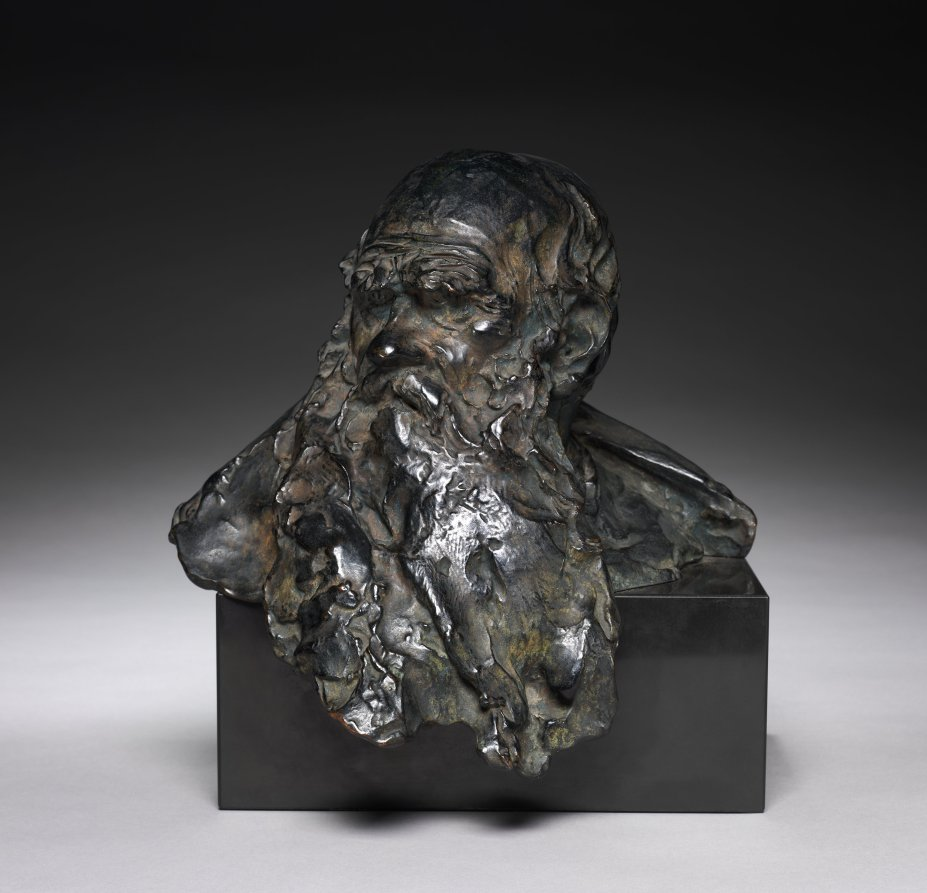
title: Bust of Tolstoy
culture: France, late 19th-early 20th century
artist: Théodore Rivière (French, 1857–1912)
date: d. 1985 – 1905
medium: bronze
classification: Sculpture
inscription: Signed on back of shoulder to left: "Theodore Riviere"